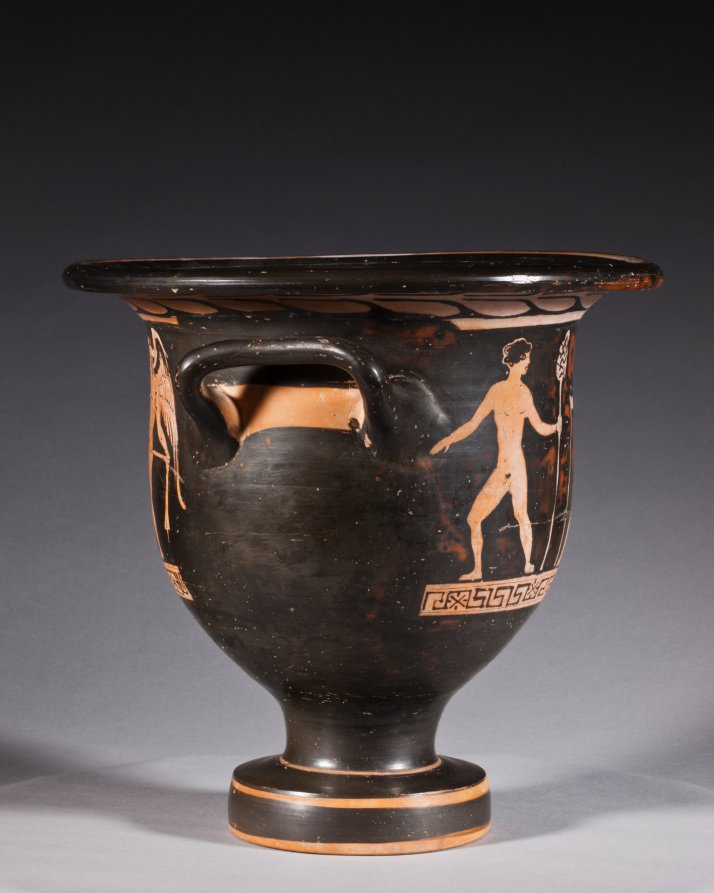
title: Red-Figure Bell Krater (Mixing Vessel): Aphrodite and Eros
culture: South Italian, Apulian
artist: attributed to Graz Painter (South Italian, Apulian, active c. 380–360 BCE)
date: c. 370–360 BCE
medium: ceramic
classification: Ceramic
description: This small mixing vessel shows a finely dressed woman seated on a chest and holding up a mirror to admire herself. Before her stands Eros, the winged god of love, holding a ribbon or sash. Behind the woman stands a pillar with the inscription ΑΦΡΟΔΙΤΗ, or APHRODITE, the goddess of love. Such labels are rare on vases, and scholars debate whether this names the woman shown as Aphrodite herself, with her son Eros, or a bride envisioning herself as Aphrodite, just before her wedding.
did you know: The dancing nude youths on the reverse are unusual; typically they would be standing and draped.